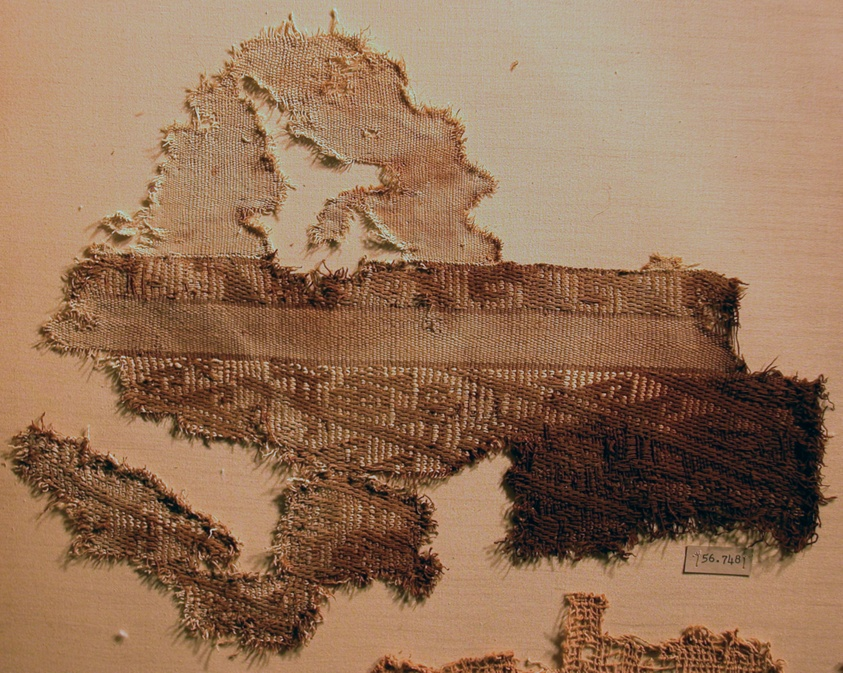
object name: Textile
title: Fragment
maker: Peru, north coast, Culebra Valley, La Capilla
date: A.D. 1000/1476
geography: Peru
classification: textile; weaving